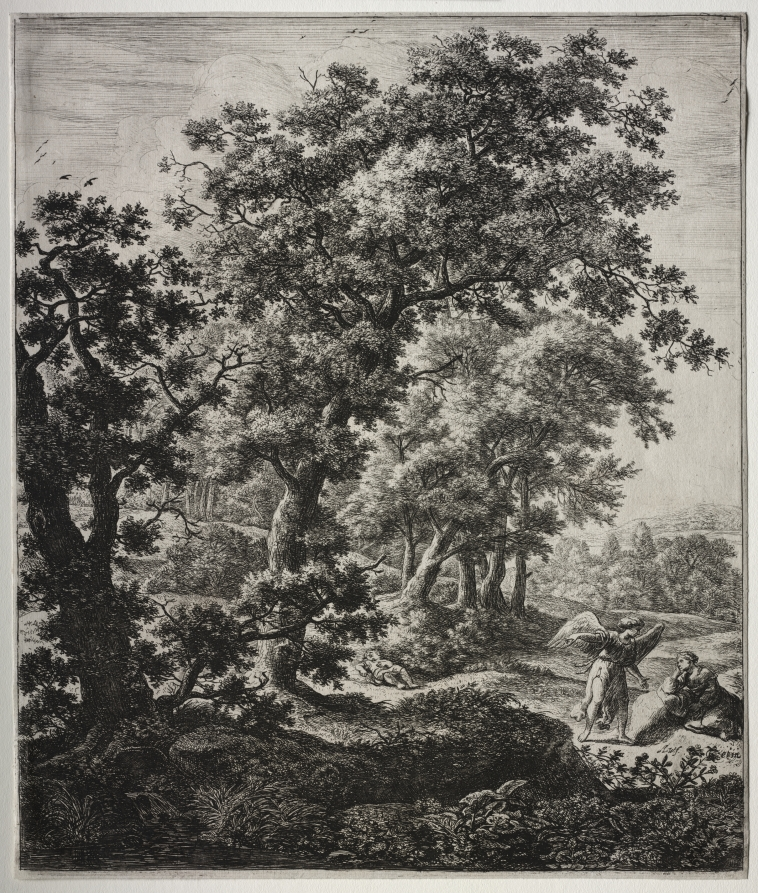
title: Six large upright landscapes with scenes from the Old Testament: Hagar Comforted by the Angel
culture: Netherlands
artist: Anthonie Waterloo (Dutch, 1609/10–1690)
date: 1640–90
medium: etching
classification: Print